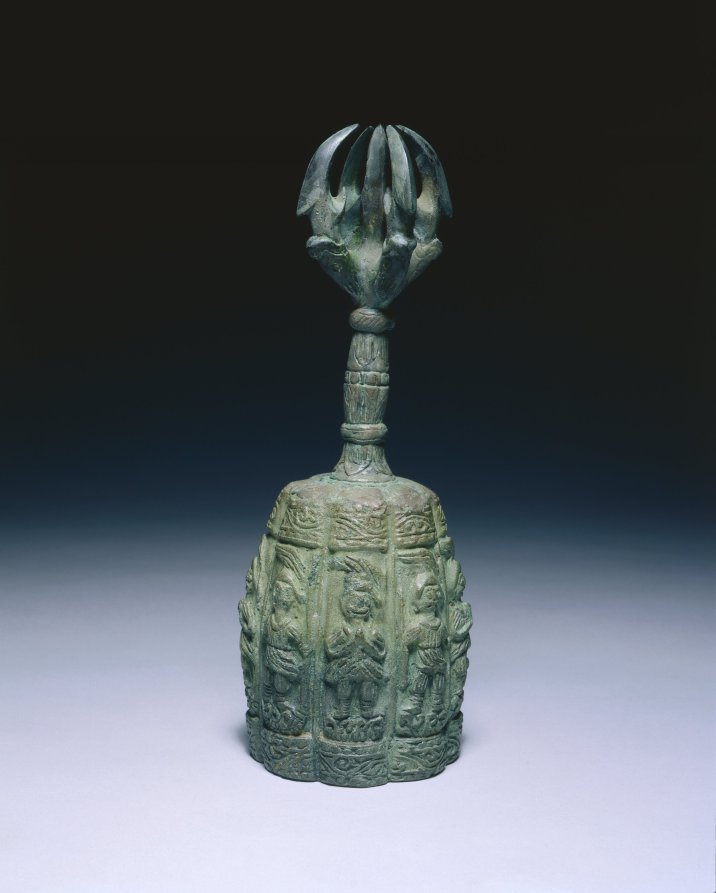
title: Buddhist Ritual Bell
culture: Korea, Goryeo dynasty (918–1392)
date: 1300s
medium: bronze; with incised designs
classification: Metalwork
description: This Buddhist ritual bell is called the "five-pronged" bell due to the four prongs bending toward a central prong at the end of the handle. This shape is a vajra, or lightning bolt, a powerful and important symbol in esoteric Buddhism, which originated in India, spread across Asia, and was practiced in Korea.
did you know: Called a vajra in Sanskrit, this implement is used in Buddhist rituals meant to destroy ignorance.